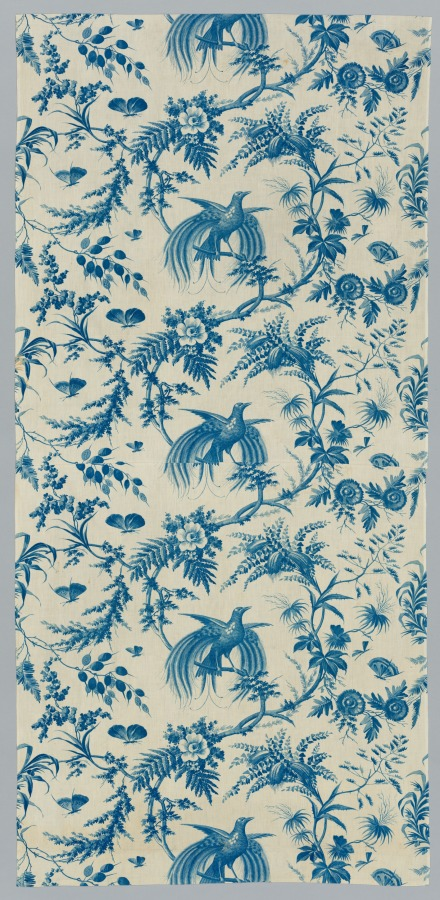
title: Strip of Copperplate Printed Cotton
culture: France, early 19th century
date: early 1800s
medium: copperplate printed cotton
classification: Textile